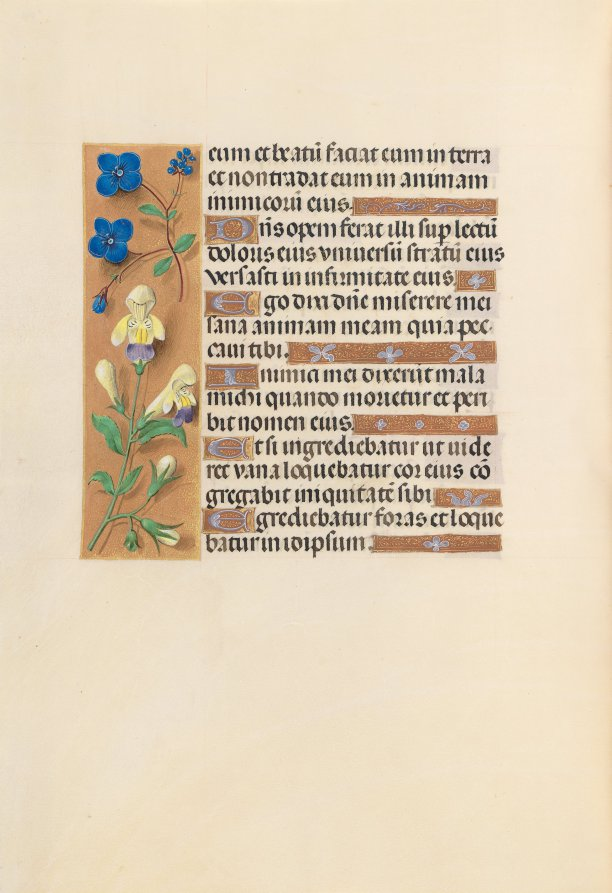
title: Hours of Queen Isabella the Catholic, Queen of Spain: Fol. 241v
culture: Flanders, Ghent and Bruges, late 15th century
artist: Master of the First Prayerbook of Maximillian (Flemish, c. 1444–1519)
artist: and Associates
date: c. 1500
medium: ink, tempera, and gold on vellum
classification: Bound Volume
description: This manuscript was illuminated by a circle of at least five highly organized manuscript painters active in the Flemish cities of Ghent and Bruges. The principal illuminator was Alexander Bening, who painted the majority of the book's miniatures. Manuscripts produced by this circle of artists are renowned for the decoration of their borders, which typically feature a rich variety of realistically-painted flowers, birds, and butterflies. This prayer book, called a book of hours, was intended not for a cleric, but for the private devotions of a lay person-in this case, Isabella the Catholic, Queen of Spain (1451-1504). Isabella's coat of arms embellishes the book's frontispiece. It is unlikely that the book was commissioned by the Queen herself; rather, she probably received it as a diplomatic gift from someone courting her patronage, perhaps Cardinal Francisco Jimenez de Cisneros. A Franciscan friar, Jimenez was dependent upon Isabella for his advancement, first to the post of Queen's confessor in 1492, and then to Archbishop of Toledo in 1495.